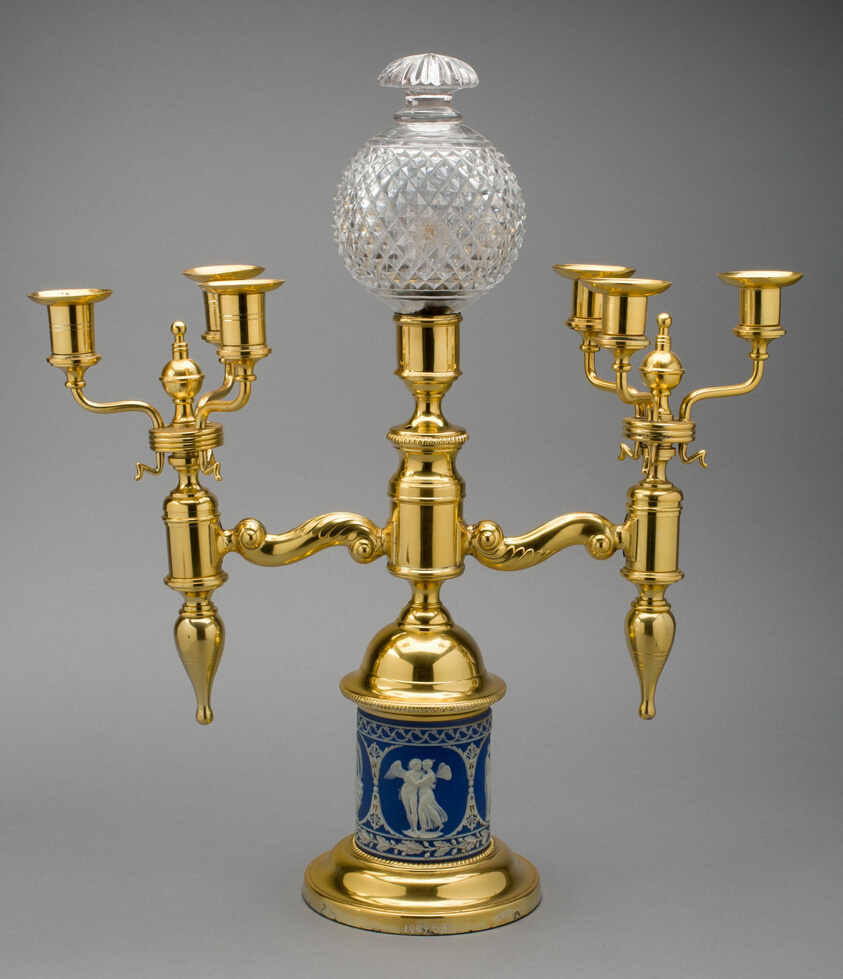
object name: Decorative Arts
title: Candelabra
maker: Wedgwood Manufactory (England, founded 1759)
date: 19th century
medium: Silver gilt, stoneware, glass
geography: Burslem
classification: candleholder - candelabra; candleholder; decorative arts